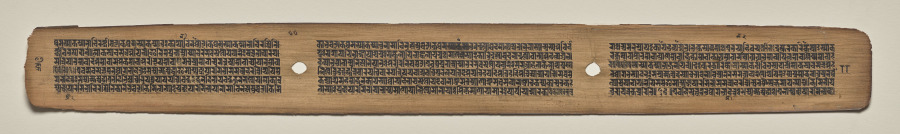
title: Text, Folio 88 (verso), from a Manuscript of the Perfection of Wisdom in Eight Thousand Lines (Ashtasahasrika Prajnaparamita-sutra)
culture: Eastern India, Bihar, Vikramashila Monastery. Painting: Nepal, Kathmandu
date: Sunday, September 14, 1119 (year 239 of the Newar Samvat in the month of Ashvina)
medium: gum tempera and ink on palm leaves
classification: Painting